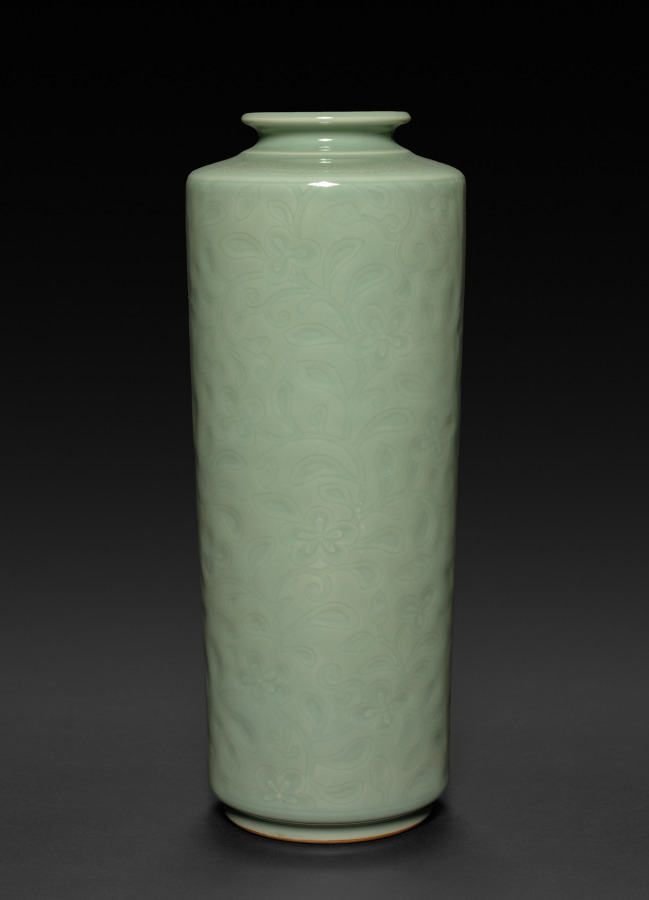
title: Tong-Shaped Vase with Flowers and Grasses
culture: Japan, Taishō period (1912–26) or Shōwa period (1926–89)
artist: Seifū Yohei IV (Japanese, 1872–1951)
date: 1914–46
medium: Porcelain with molded and carved design and green glaze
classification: Ceramic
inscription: 清風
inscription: 彫画 / 青磁花瓶 / 清風造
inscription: 青磁花瓶 / 彫画 【印】清風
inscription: 清風造 【印】成山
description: Many of the vases created by Yohei III and IV were made with reference to and in emulation of Chinese ceramics in both form and glazing. The vessel type called tongping, pronounced tōbin in Japanese, is tall and cylindrical, like the thick length of bamboo referenced in the shape of the ideograph tong 筒. Unlike the ancient gu, hu, and guan, this form did not emerge in China until the Ming dynasty, and many such vases date to the early Qing dynasty. Two green-glazed vases, CMA 2022.225 by Yohei III and this one by Yohei IV, are interpretations of this form. Yohei III’s version has slightly hunched shoulders and is somewhat wider at the top below the small neck and lip. Yohei IV’s vase is more angular. The wide rack of molded cloud encircling the Yohei III vase rises subtly from very low relief banding above and below it, accentuating the vessel’s rounded edges and complementing the form. In contrast, the allover flower vine pattern on the body and “seven treasures” pattern at the collar of the vase by Yohei IV evokes a garment’s cuffed sleeve, like the common English appellation for this type of vessel—“sleeve vase.”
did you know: Seifū Yohei IV continued to create works in the studio’s signature colors but also produced pieces with strong color and flare that were his interpretations of Qing dynasty (1644–1911) glazes.